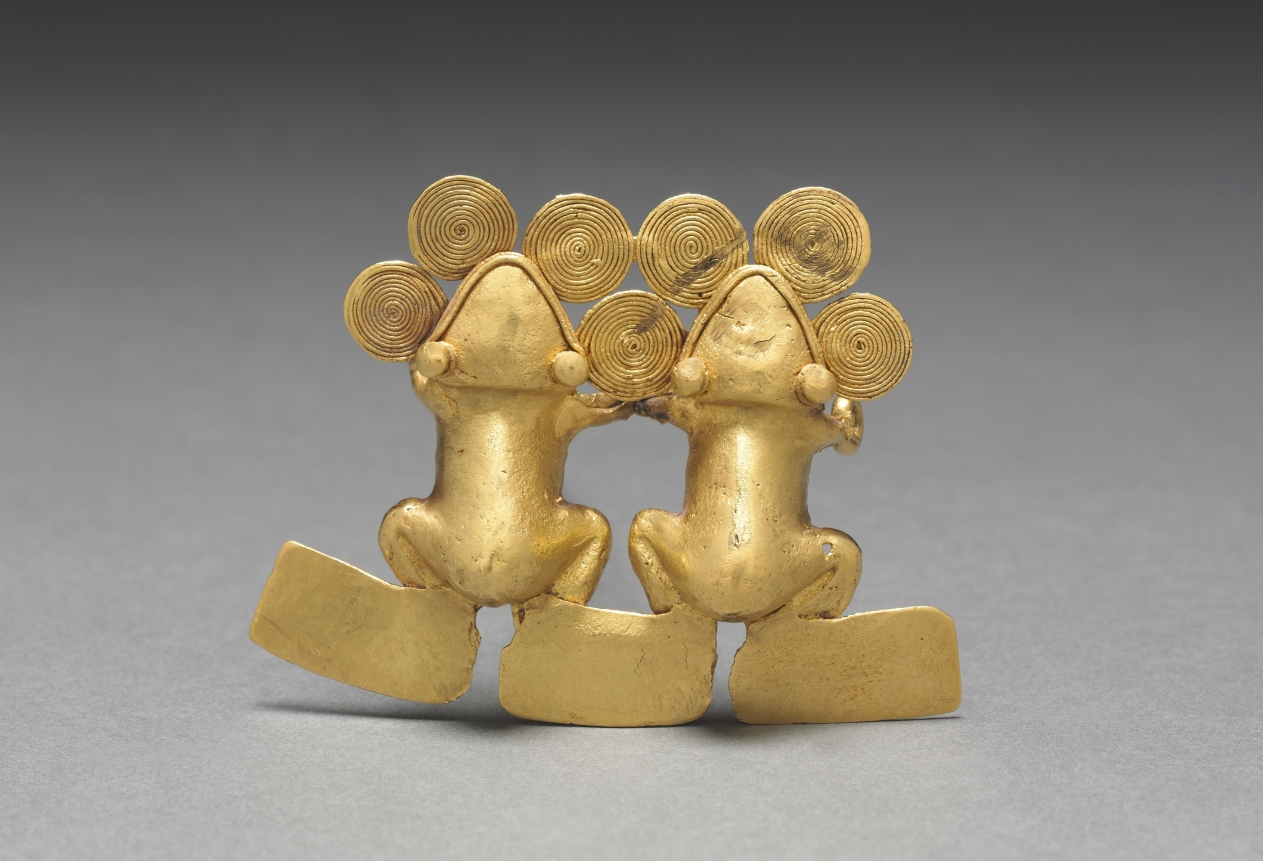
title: Double Frog Pendant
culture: Western Panama, Veraguas-Gran Chiriquí Style, 11th-16th century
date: c. 1000–1550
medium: cast and hammered gold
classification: Metalwork